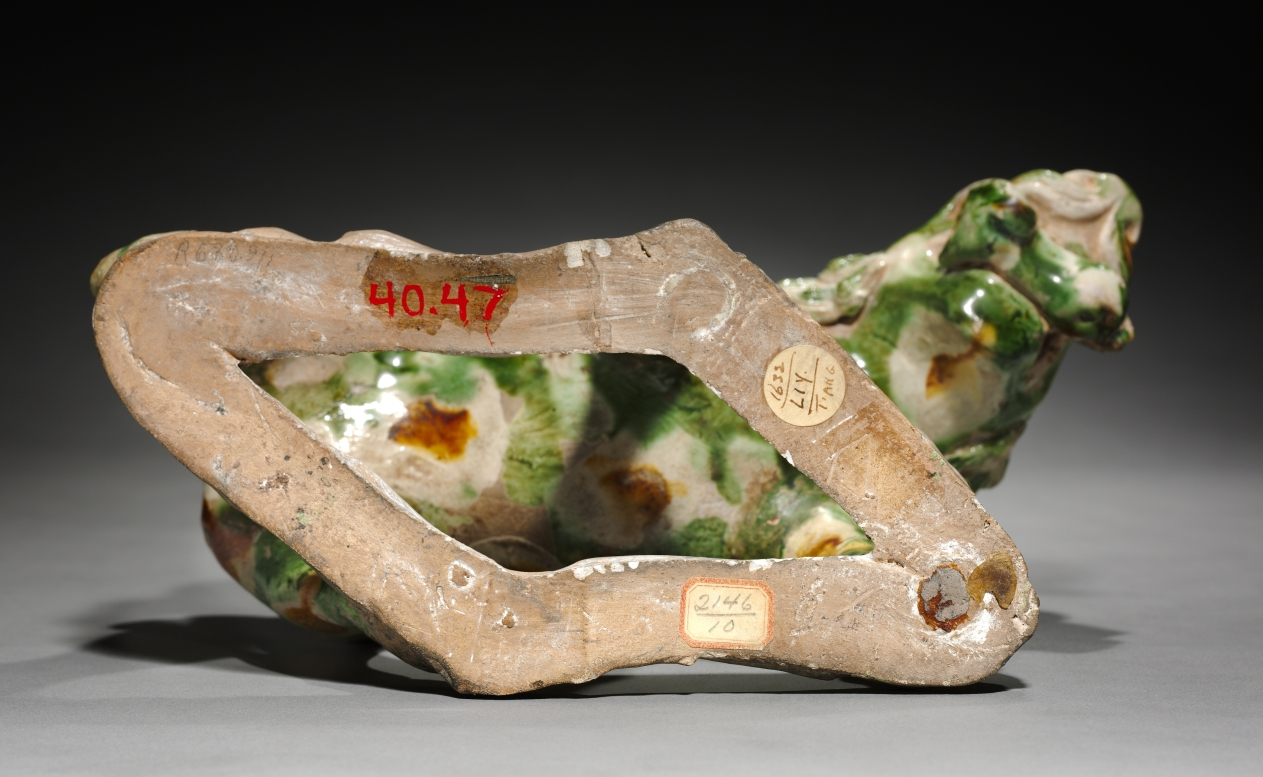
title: Lion with Cub in Mouth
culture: China, Tang dynasty (618-907)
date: 618–907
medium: earthenware with polychrome glaze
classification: Sculpture